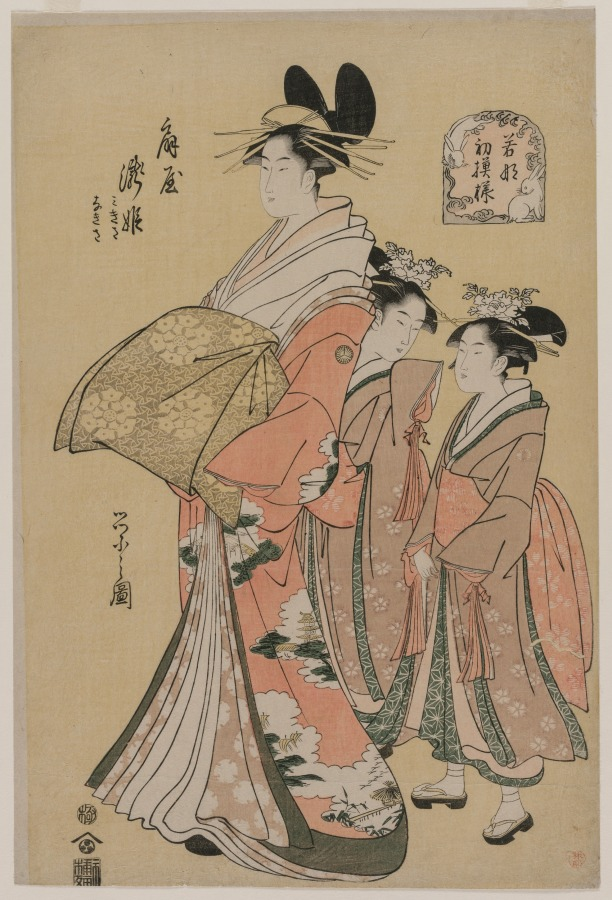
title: The Courtesan Takihime and Attendants (from the series New Patterns of Young Greens)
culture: Japan, Edo period (1615–1868)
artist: Chōbunsai Eishi (Japanese, 1756–1829)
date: 1795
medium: color woodblock print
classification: Print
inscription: Signature: Eishi zu Seal: kiwame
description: The designs on Takihime’s outer robe describes fragments of scenery—bridge, castle, wind-filled sails amid clouds—while her attendants’ robes are more conventionally decorated with scattered flowers. The tassels on their sleeves were worn only by young girls. All three wear the triple-fan crest of the Ogiya ("House of Fans") tea house on the shoulders of their kimono. The cartouche in the upper-right corner of the print identifies the series title and time of year. It is New Year, the same season depicted in Engetsudo’s scroll Courtesan and Attendants (see 1985.255). Courtesans strolling through the streets with their attendants were common sights during evening hours in the Yoshiwara.